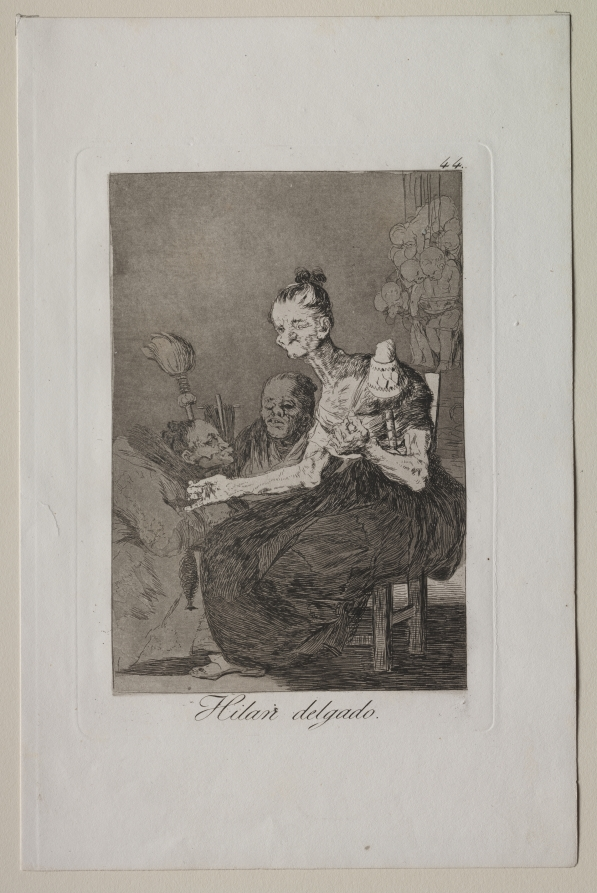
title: They Spin Finely, Plate 44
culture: Spain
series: Los Caprichos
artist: Francisco de Goya (Spanish, 1746–1828)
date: 1799, printed c. 1855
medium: etching and aquatint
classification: Print